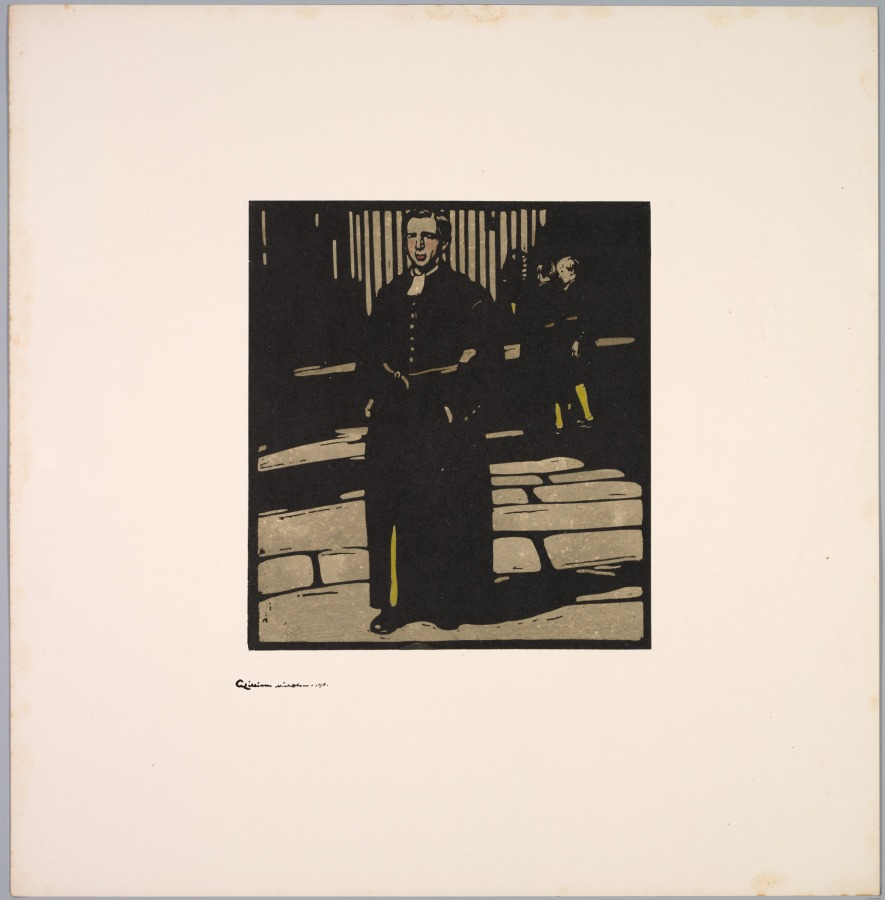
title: London Types: Bluecoat Boy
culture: England, 19th century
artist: William Nicholson (British, 1872–1949)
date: 1898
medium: woodcut hand-colored with watercolor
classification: Print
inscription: lower left margin, in black ink: William Nicholson - 1898 -